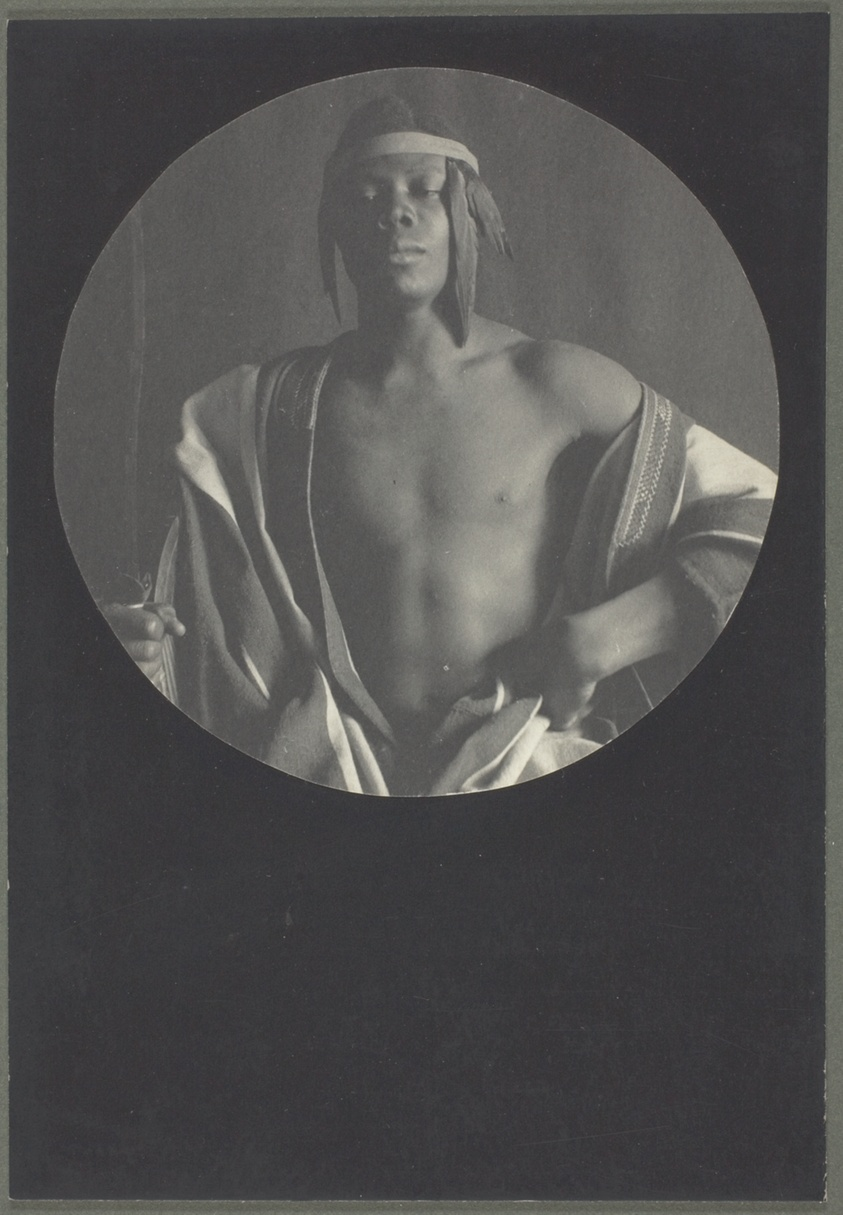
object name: Photograph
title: Ethiopian Monarch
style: Pictorialism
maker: F. Holland Day (American, 1864–1933)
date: 1897, printed c. 1902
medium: Platinum print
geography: United States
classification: platinum print; photographic process; photography; photograph